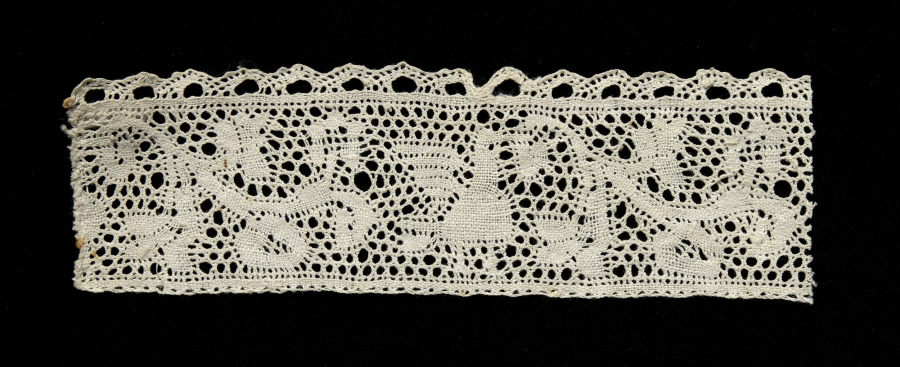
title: Lace Insertion and Edging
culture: Italy, Abruzzi, Pescocostanzo(?)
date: 1600s–1700s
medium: Bobbin lace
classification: Lace